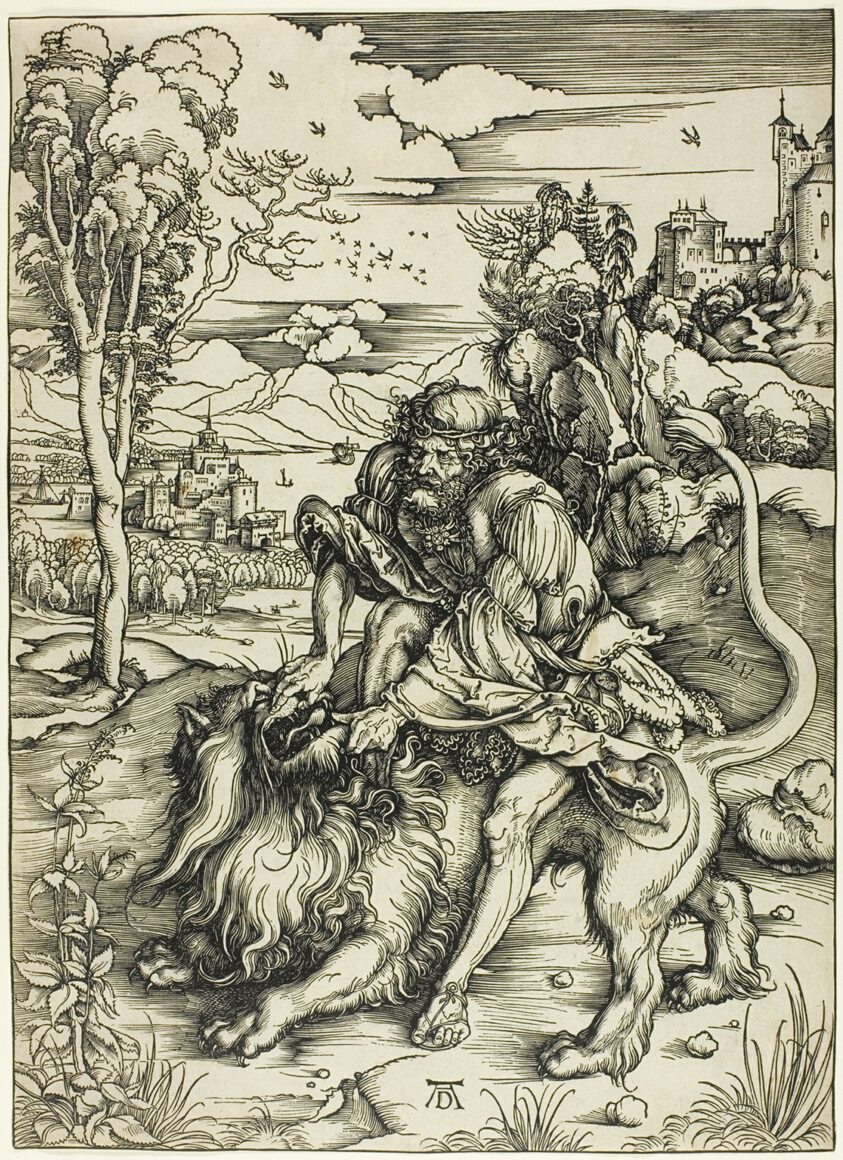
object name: Print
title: Samson Rending the Lion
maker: Albrecht Dürer (German, 1471-1528)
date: 1496/97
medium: Woodcut in black on ivory laid paper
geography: Germany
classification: woodcut; print; prints and drawing; paper